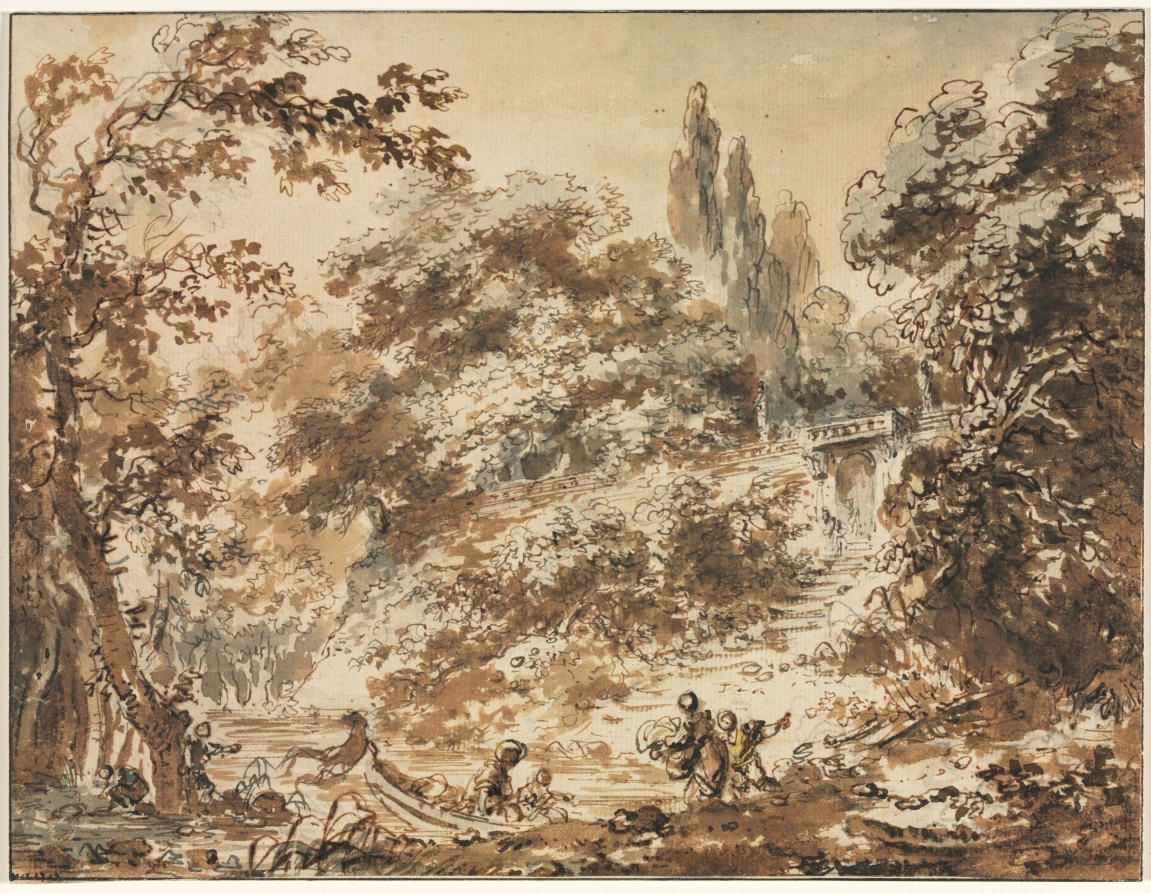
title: Scene in a Park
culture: France, 18th century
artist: Jean-Honoré Fragonard (French, 1732–1806)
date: c. 1760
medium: pen and brown and gray ink, brush and brown and gray wash, and traces of yellow watercolor over black chalk; framing lines in black ink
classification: Drawing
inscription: lower left, in black ink: [illegible]